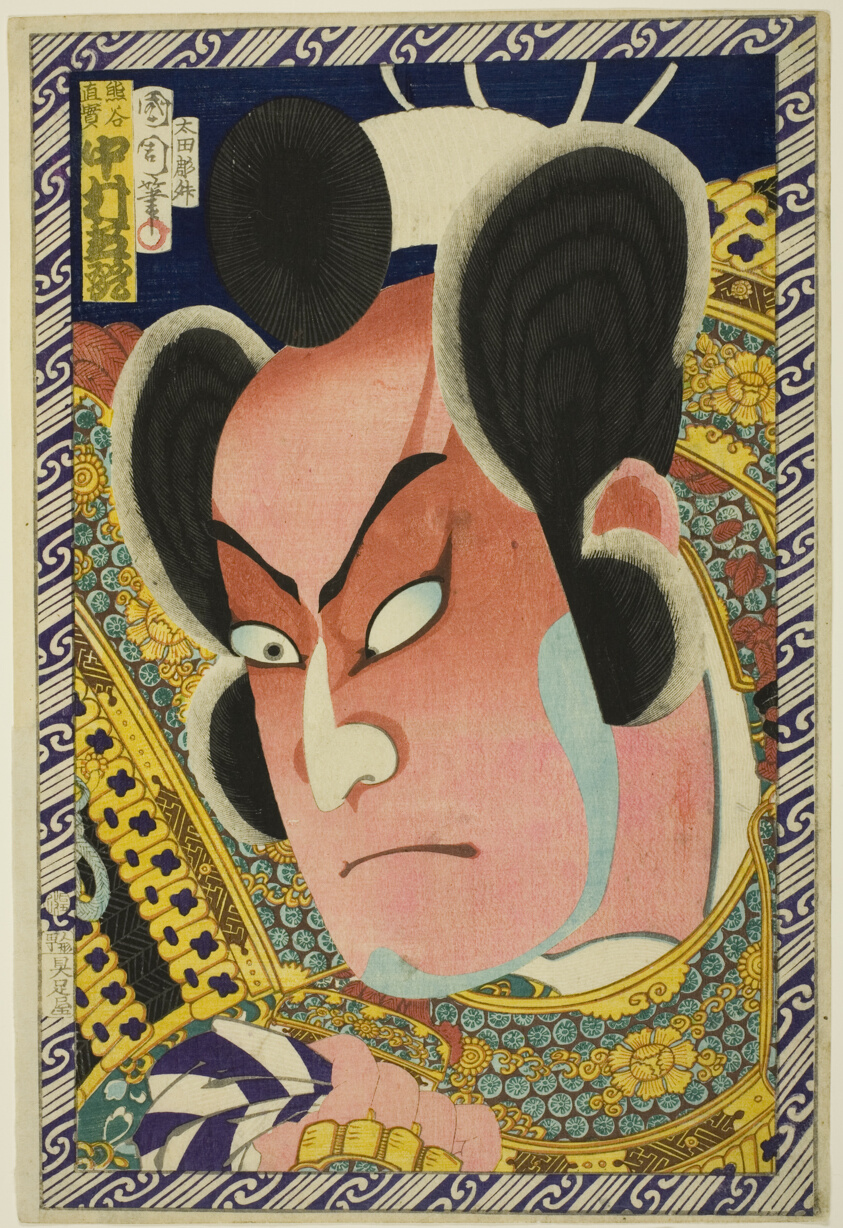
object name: Print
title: The Actor Nakamura Shikan IV as Kumagai Naozane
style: Japanese (culture or style)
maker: Toyohara Kunichika (Japanese, 1835-1900)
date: 1869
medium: Color woodblock print; oban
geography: Japan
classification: woodblock print; print; asian art